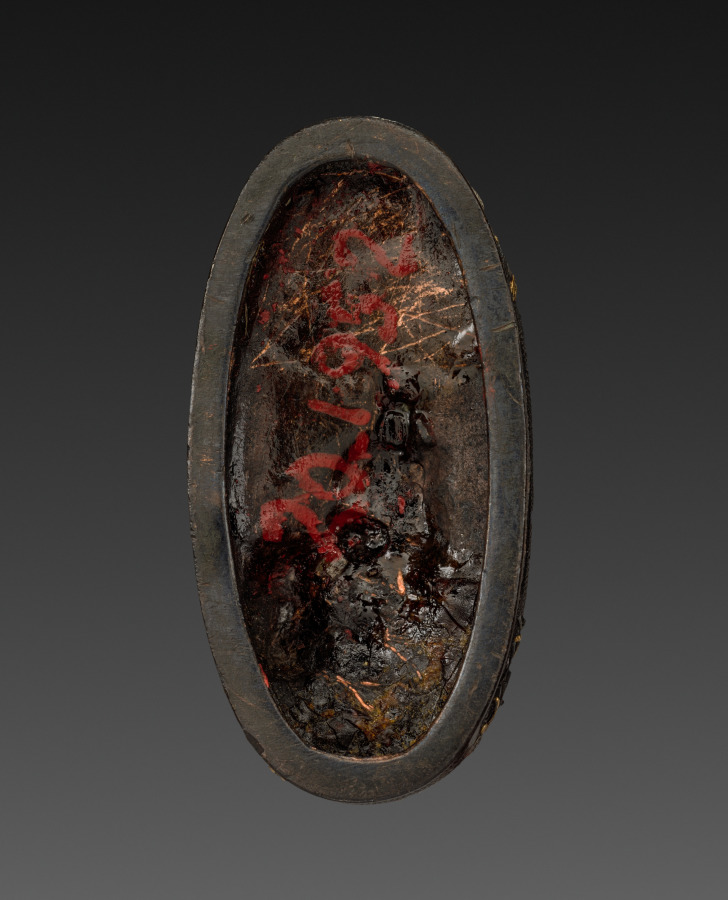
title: Sword-Hilt Pommel (Kashira)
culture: Japan, Edo period (1615–1868)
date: 1700–1850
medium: shakudo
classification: Arms and Armor